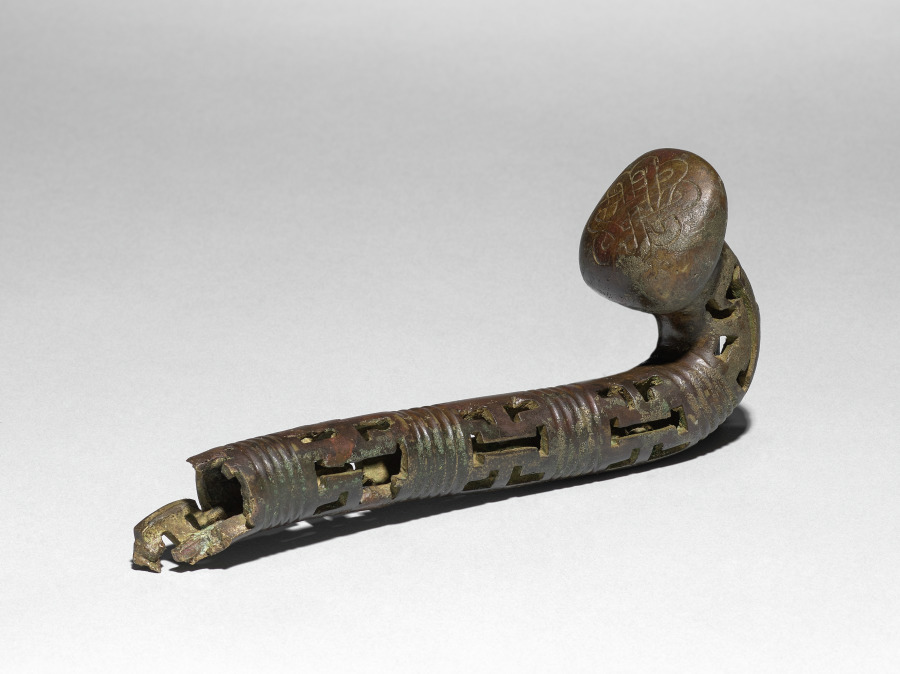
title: Tail for a Feline Incense Burner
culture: Iran, Khurasan, Seljuq period of Iran (1037–1194)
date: 1150–1200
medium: Copper alloy, cast, engraved, chased, and pierced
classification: Metalwork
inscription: Qur'an sura al-jum'ah (The Friday Congregation) 62:9-10 (on neck and spine)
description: In Iran during the 1000s and 1100s, vessels in the shape of animals gained popularity, especially as incense burners. Felines were favored in Persian art and this piece may represent a caracal, a type of lynx. The head of the creature was cast separately and is removable to fill its body with hot coals and incense. Qur’anic verses on the neck and spine remind worshippers to set work aside, attend prayer, and then disperse to seek God’s bounty. The diffusion of perfumed smoke through the burner’s pierced palmette design may have served as a sensorial reminder of this teaching.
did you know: The end of the tail is decorated with a guilloche pattern of interlacing curved lines.